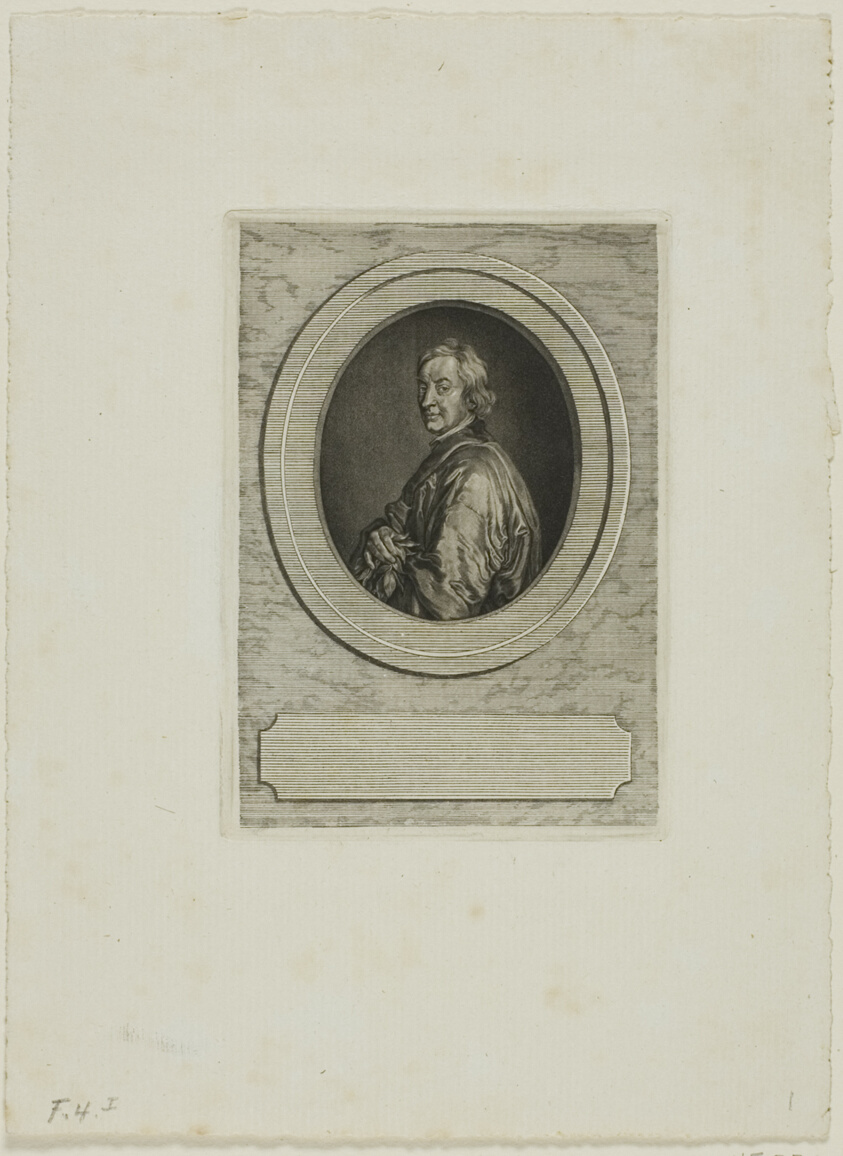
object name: Print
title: John Dryden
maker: Jean-Baptiste de Grateloup (French, 1735-1817)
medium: Aquatint on paper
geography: France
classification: aquatint; print; prints and drawing